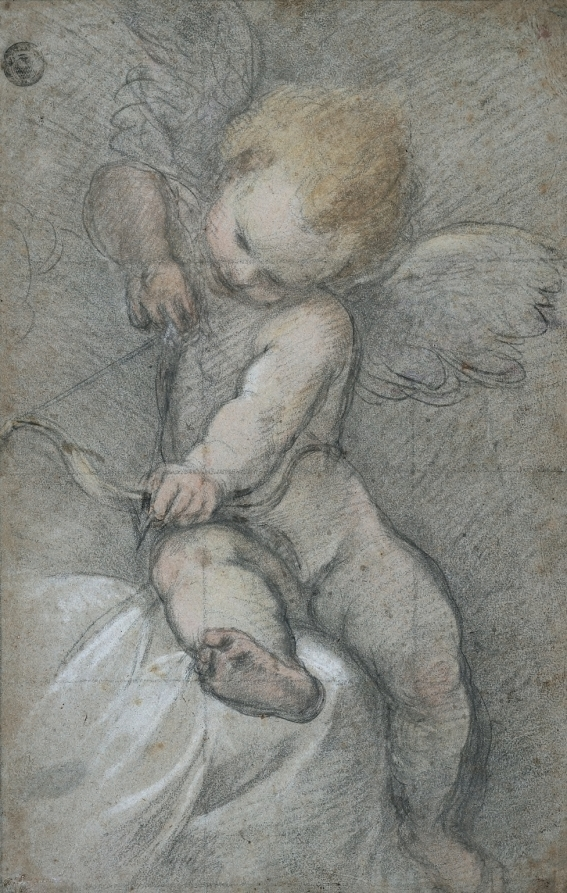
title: Cupid Drawing His Bow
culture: Italy, 16th century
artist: Federico Barocci (Italian, 1528–1612)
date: c. 1560s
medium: black chalk with pastel (stumped in places), heightened with white chalk, squared with black chalk; framing lines in graphite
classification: Drawing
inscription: lower left, in brown ink: [illegible]; verso, upper left, in graphite: 4 [circled]; upper center left, incised: adamid[i?] bl / hotel f[o?] / Chateau Front[as?]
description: This drawing formed part of the painter Federico Barocci's painstaking working method, which began with studies from nature, included sculpted models in wax, and concluded with full-scale cartoons in color. A detailed figure study such as this would have followed numerous compositional and life studies in preparation for the final cartoon. The squares drawn over the figure indicate it was meant to be transferred to a larger format. Barocci may have made this drawing as a preparatory study for his large altarpiece depicting the Martyrdom of St. Sebastian intended for the Bonaventura Chapel in the Urbino cathedral. The legs of the putto were used in his final rendering of the Christ Child in that composition. The technique of using black and colored chalks reflects the introduction, in the 1560s, of colored chalks (called "pastelli") to Italy, knowledge of which likely spread from Venice down the Adriatic coast to Barocci's home in Urbino.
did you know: The grid of squares drawn over this figure was used by the artist or his workshop to transfer the composition to a larger format.